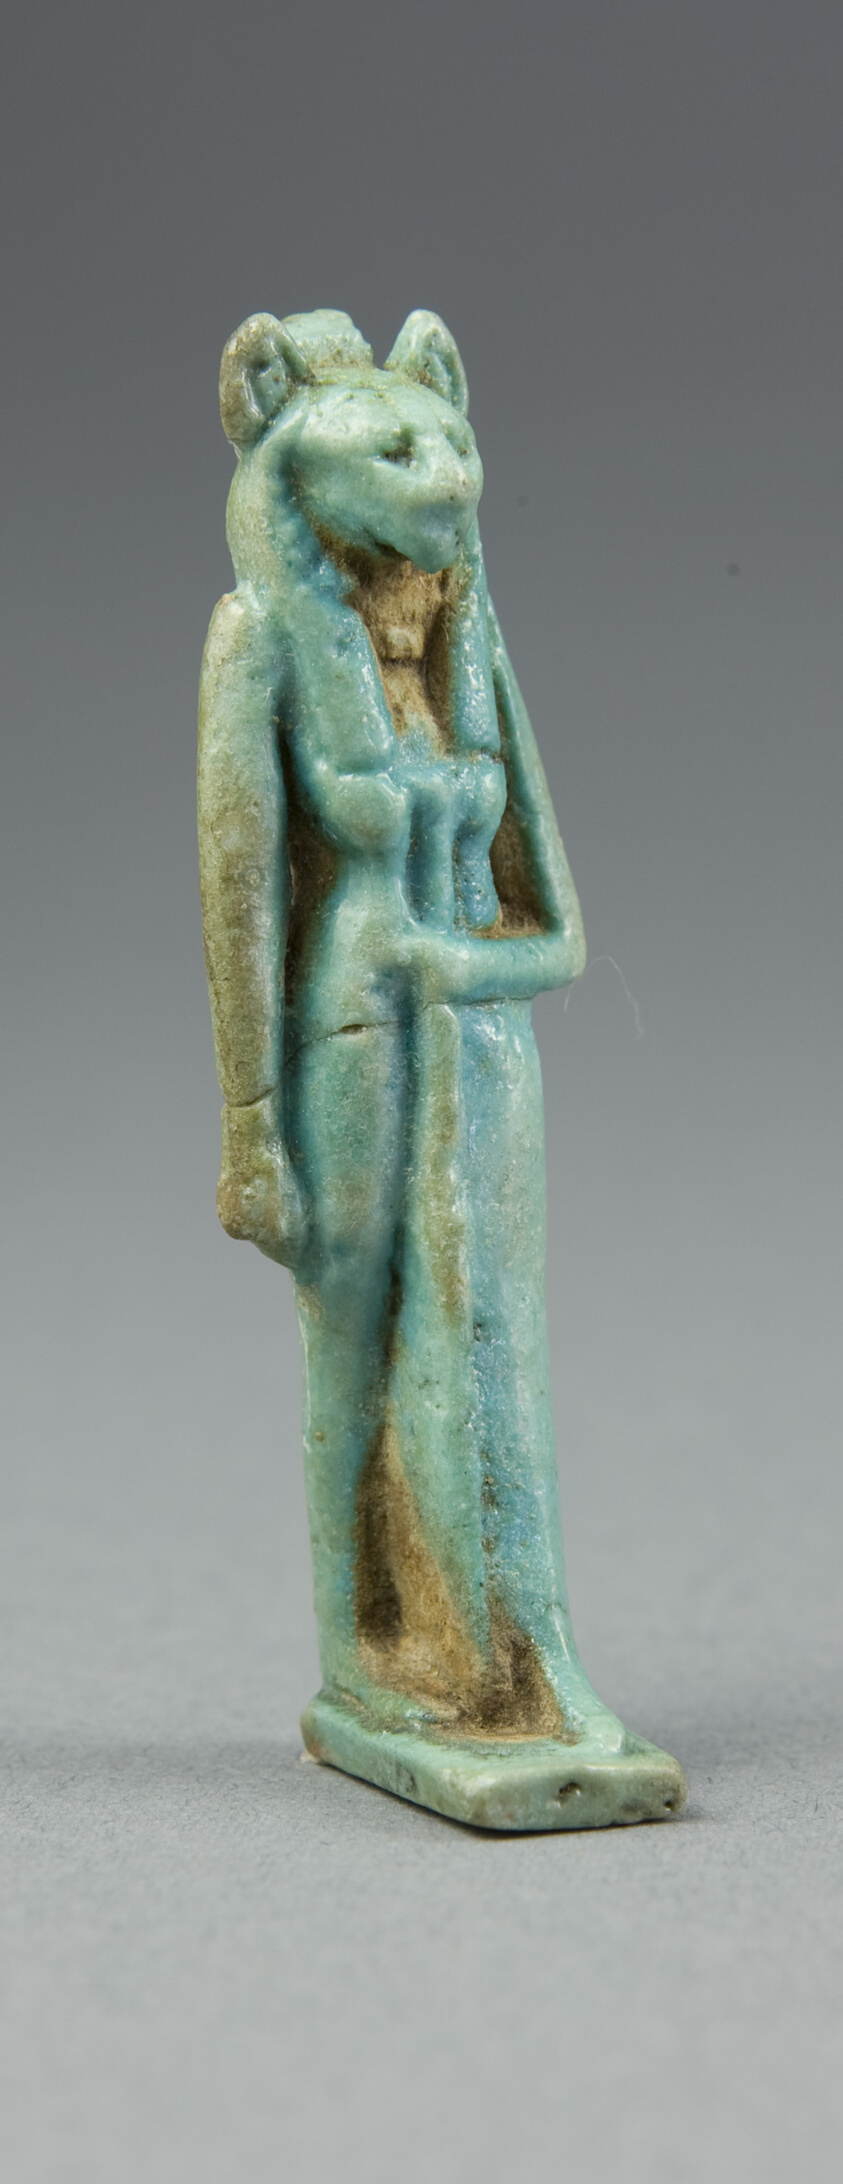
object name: Costume and Accessories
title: Amulet of a Lion-Headed Goddess Holding a Scepter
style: egyptian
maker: Egyptian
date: Third Intermediate Period, Dynasties 21–25 (about 1069–664 BCE)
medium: Faience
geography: Egypt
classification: amulet; jewelry; ceramics; ancient art; costume; faïence (composite material)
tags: goddesses